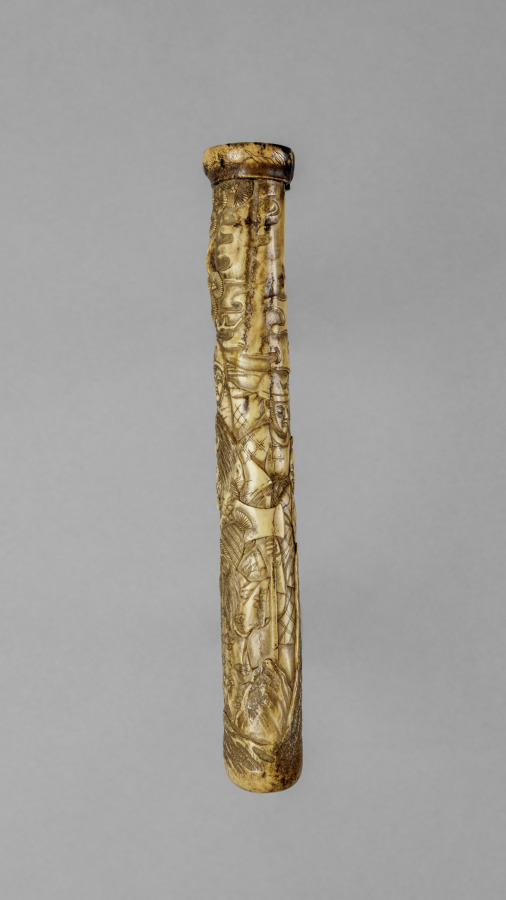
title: Case for a Knife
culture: Japan, Edo period (1615–1868)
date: late 1700s- early 1800s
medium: ivory, steel or iron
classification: Arms and Armor